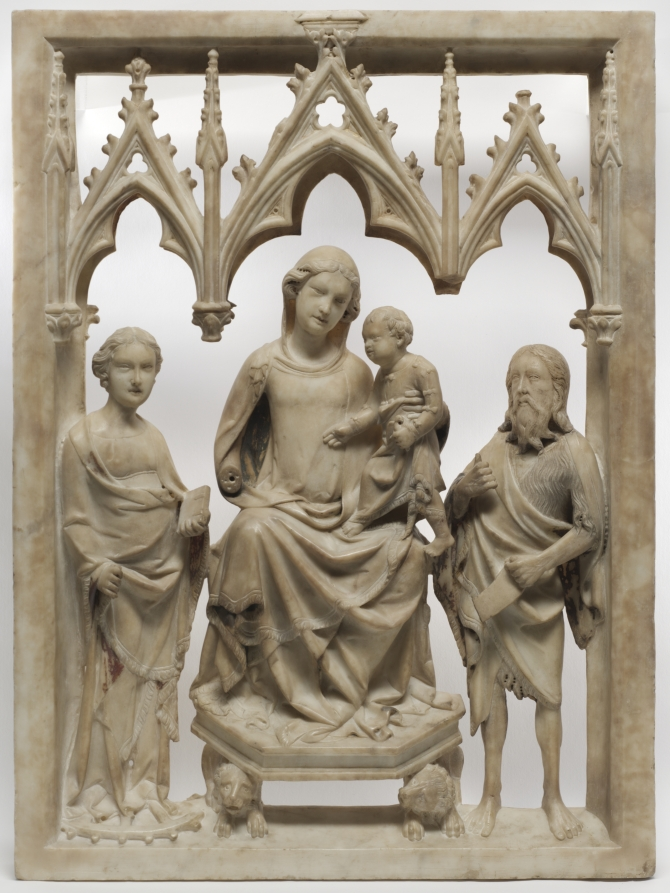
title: Madonna and Child with Saints Catherine and John the Baptist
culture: Italy, Siena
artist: Giovanni di Agostino (Italian, c. 1310–1370)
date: c. 1340–50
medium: marble with traces of polychromy and gilding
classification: Sculpture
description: The Madonna is seated beneath a Gothic-arched canopy flanked by Saints Catherine and John the Baptist. A rectangular frame encloses the group. Most likely from a Sienese church interior, the work is probably a fragment of a larger sculptural program such as a tomb. An authentic Gothic style in sculpture appeared in Tuscany from the mid 1200s through about 1350 elucidated by the work of Giovanni di Agostino, Nicola and Giovanni Pisano, and others who were active on Siena Cathedral’s sculptural program. Agostino’s work suggests an awareness of Gothic sculpture and the decorative arts in France from which he borrowed freely. This relief was probably completed just before the plague of 1348, an event which altered the degree and character of Sienese art.